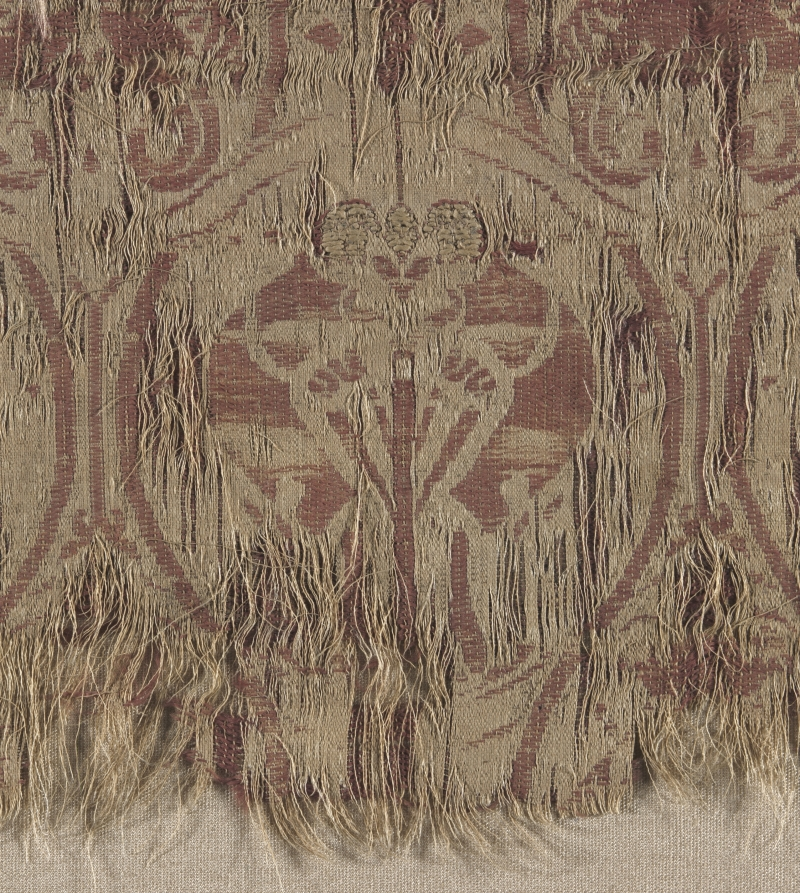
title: Silk Fragment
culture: Spain, Islamic period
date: 1150–1199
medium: lampas weave, brocaded; silk and gold thread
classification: Textile